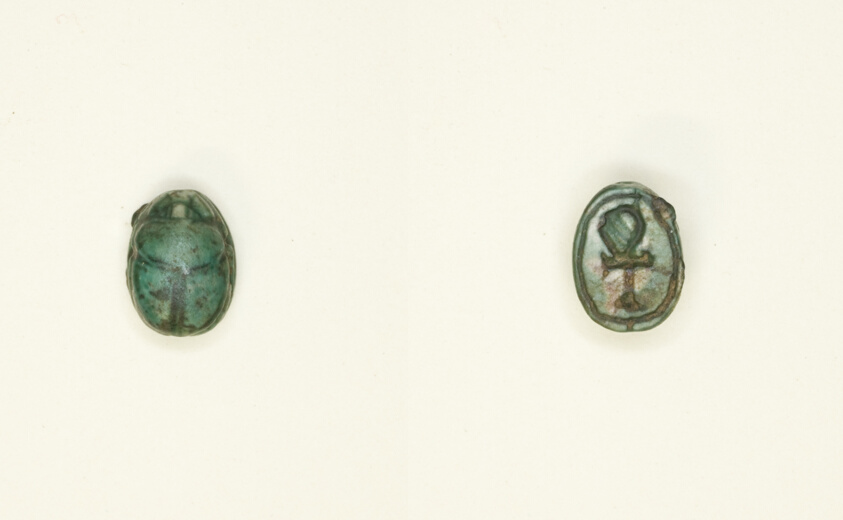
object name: Costume and Accessories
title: Scarab: Hieroglyph (Ankh Sign)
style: new kingdom, ancient, egyptian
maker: Egyptian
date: New Kingdom, Dynasties 18–20 (about 1550–1069 BCE)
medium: Glazed steatite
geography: Egypt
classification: scarab; ancient art; costume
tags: scarab beetle, insects, Hieroglyphs